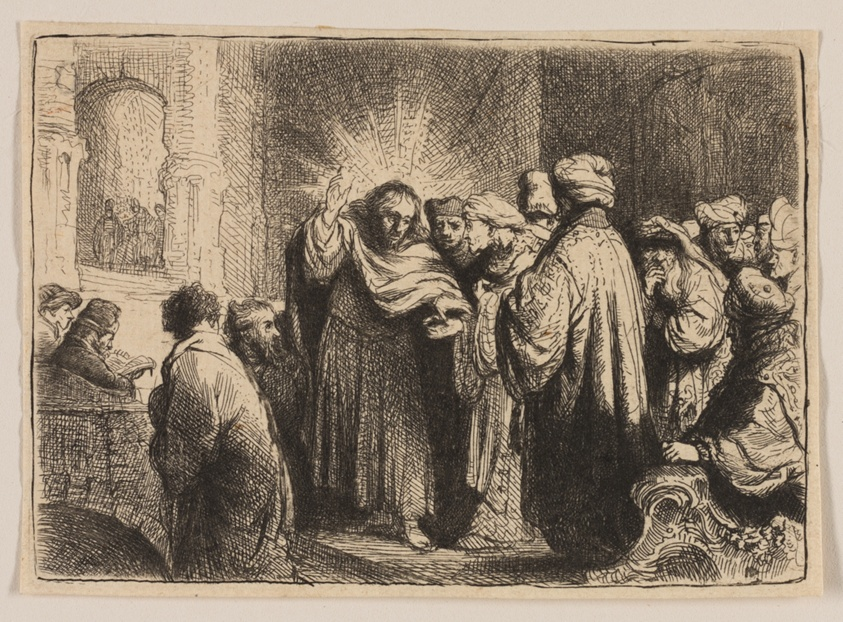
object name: Print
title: The Tribute Money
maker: Rembrandt van Rijn (Dutch, 1606-1669)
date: c. 1634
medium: Etching in black on ivory laid paper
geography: Netherlands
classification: etching; paper; print; prints and drawing